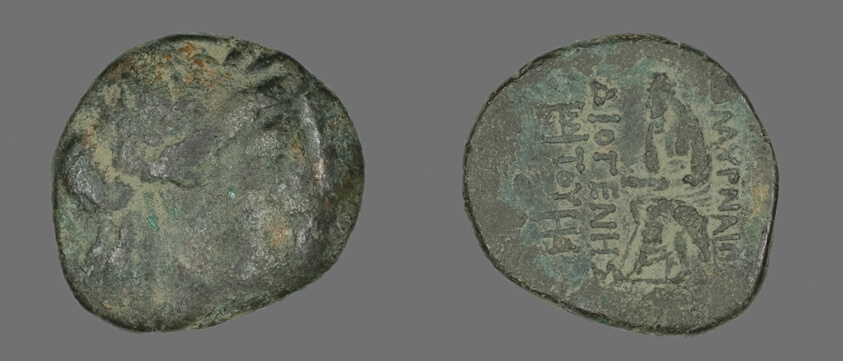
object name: Coin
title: Coin Depicting the God Apollo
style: greek, ancient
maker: Greek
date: 2nd-1st century BCE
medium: Bronze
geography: Ancient Greece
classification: coin; ancient art